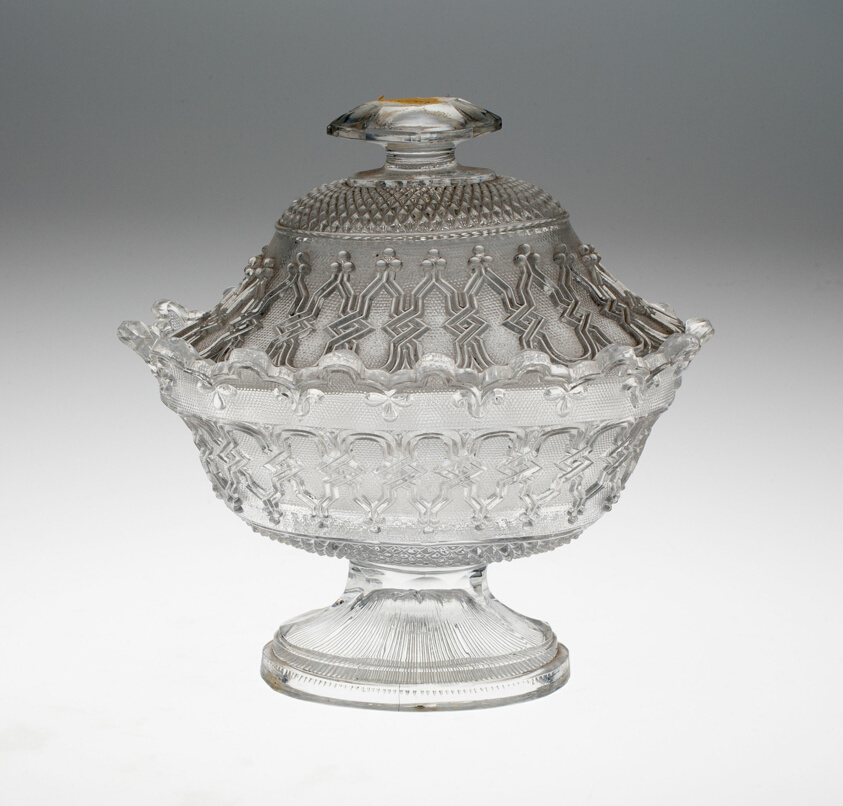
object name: Glass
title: Covered Bowl and Stand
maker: Baccarat Glassworks (French, founded 1764)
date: Mid 19th century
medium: Glass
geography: Lunéville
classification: bowl; dish (vessel); glass; european decorative arts